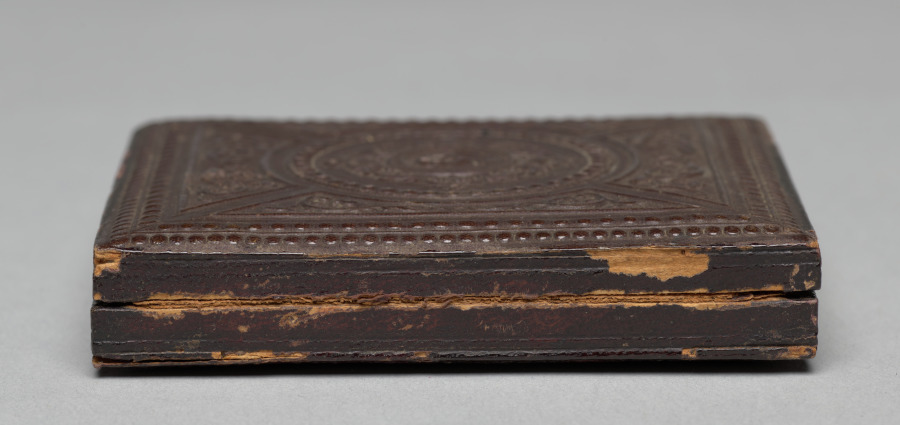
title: Teenage girl with bottle curls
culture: America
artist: Rufus Anson (American, 1820–1900)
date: c. 1855–60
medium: daguerreotype, sixth plate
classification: Photograph